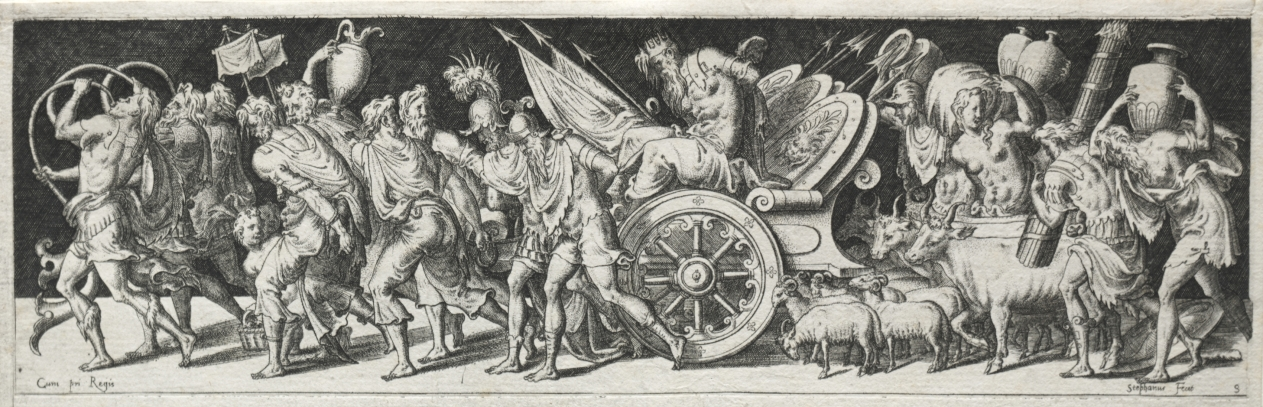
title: Combats and Triumphs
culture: France, 16th century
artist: Etienne Delaune (French, 1518/19-c. 1583)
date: probably 1560s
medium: engraving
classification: Print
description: Etienne Delaune (French, 1518/19-1583) Combats and Triumphs, probably 1560s Engravings Gift of Leonard C. Hanna 1924.671-.674 The Triumph of Bacchus Battle of Men and Animals Combat of the Naked Men Battle of the Centaurs and the Lapiths The four prints shown here come from a series of twelve known as the Combats and Triumphs. The friezelike composition reflects the artist's study of marble relief carvings on Greek and Roman sarcophagi (coffins), here reduced to a preciously small setting. Against a flat, stagelike background, Delaune's balletic warriors engage in a Mannerist version of artificial war. Etienne Delaune was inspired by the art created at Fontainebleau, but he worked in Paris and then Strasbourg during the late 1500s. His small, exquisitely executed engravings reflect his training as a goldsmith and his work as a medallist.